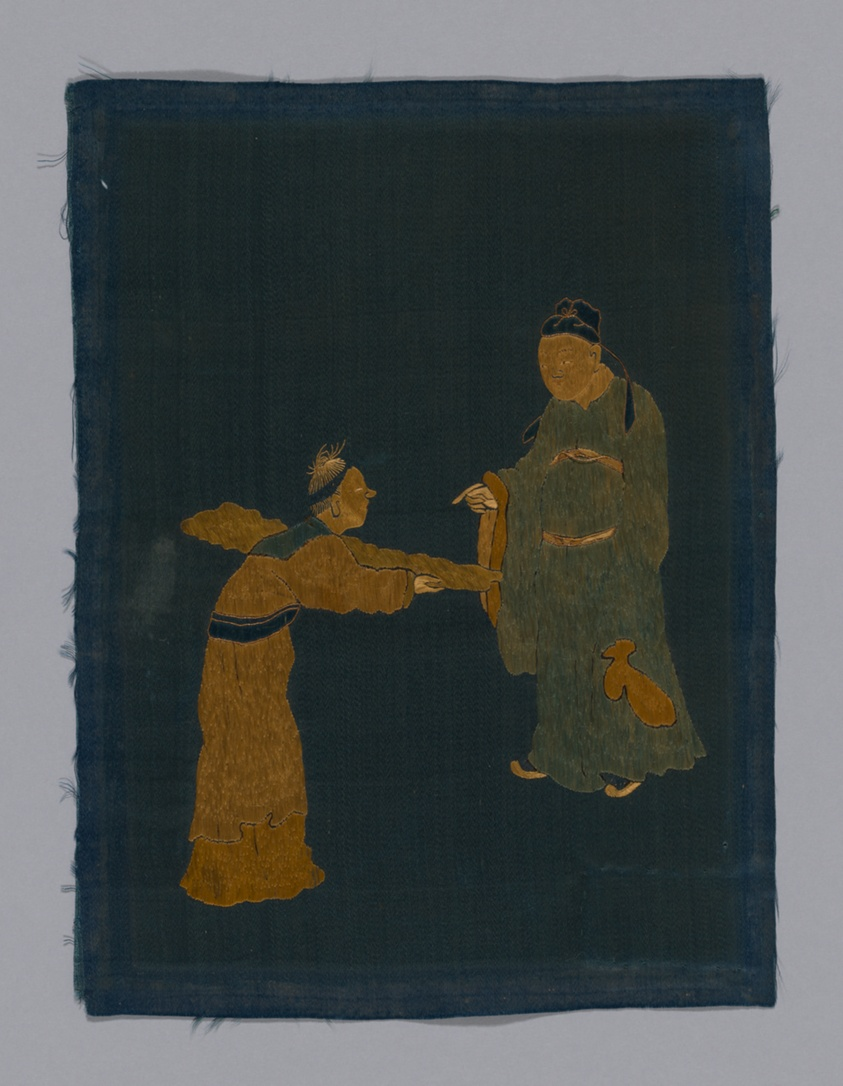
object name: Textile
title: Panel piece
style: qing, Chinese (culture or style), East Asian, asian, kangxi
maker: China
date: Qing dynasty (1644–1911), 1800/50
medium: Satin, with couched cord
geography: China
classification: textile; weaving